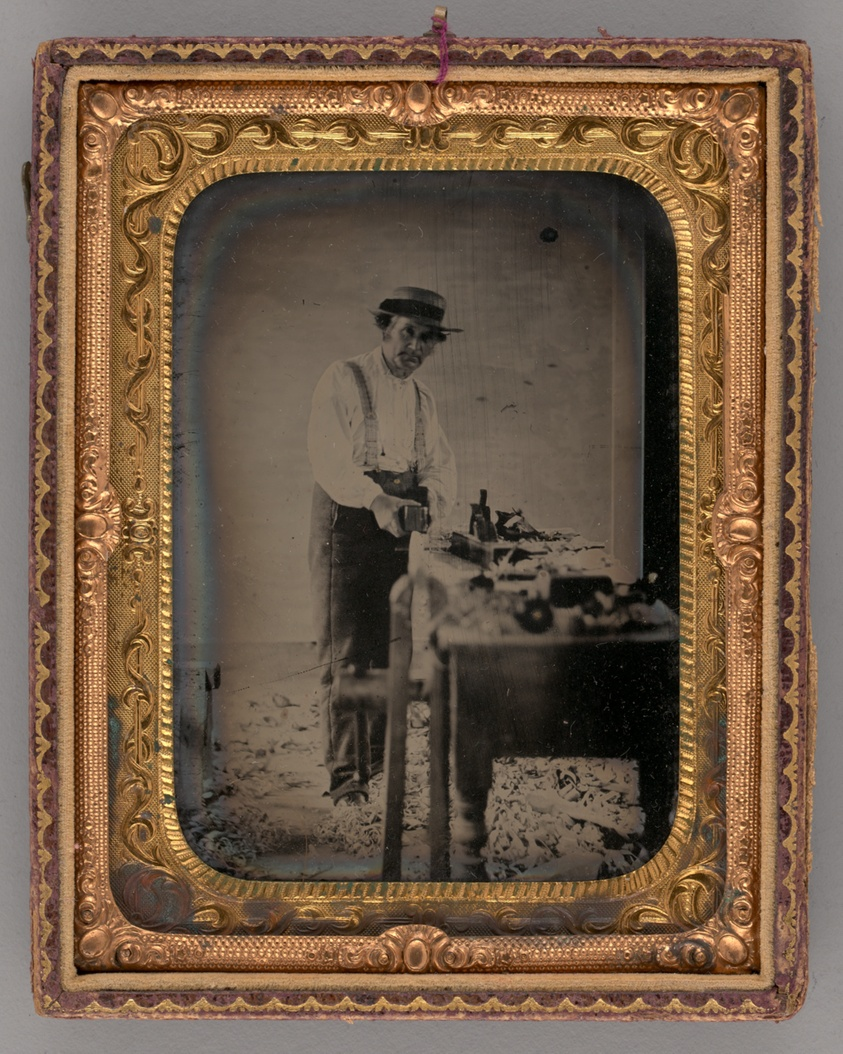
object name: Photograph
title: Untitled (Portrait of a Carpenter)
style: 19th century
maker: Unknown maker; American, 19th century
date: 1870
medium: Tintype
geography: United States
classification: portrait; photography; photographic process; photograph; tintype; portrait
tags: lundberg collection, photography, men, Male, carpentry, portrait, portraits, portraits: male subject